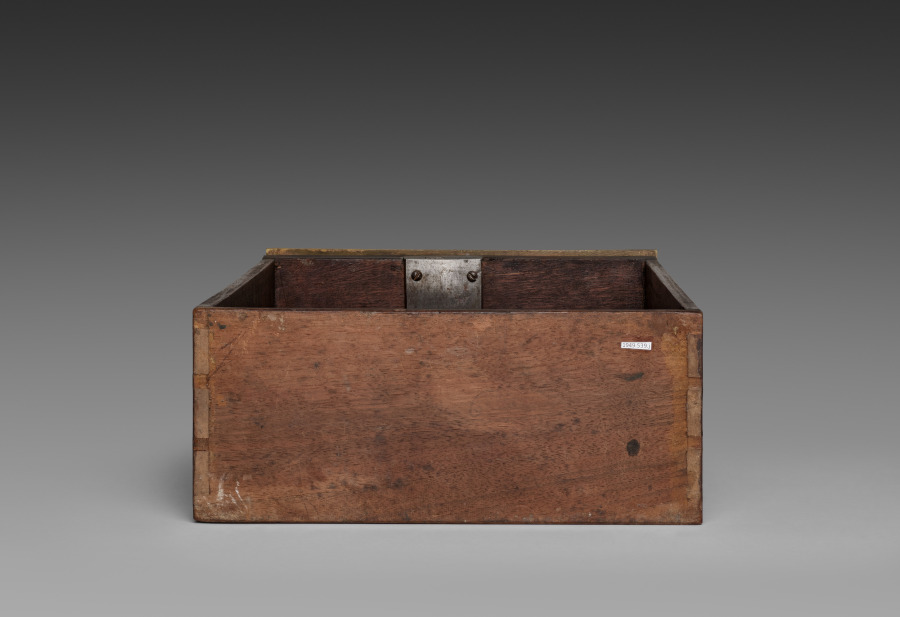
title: Side Drawer for Cabinet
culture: France, late 17th Century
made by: André-Charles Boulle (French, 1642–1732)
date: c. 1690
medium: ebony, marquetry in metal and tortoise shell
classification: Furniture and woodwork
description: Appointed cabinetmaker to King Louis XIV in 1672, André-Charles Boulle became a master of furniture making in France during the late 1600s until his death in 1732. Known primarily for his use of marquetry, in which metal patterns are inlaid into tortoiseshell then applied within the veneered surface of the furniture, Boulle established a level of quality and craftsmanship few others could achieve. As a result, his work found favor at the royal court and among other aristocrats and diplomats eager to impress the king. The inclusion of a medallion depicting Louis XIV within the bronze decoration of this chest would have identified the owner with the royal court. Often exhibiting stout architectural proportions with elegant groups of inlaid motifs such as the parrot on the central panel of this chest, Boulle’s designs are an example of the intellectual fashion for contrasting ideas, materials, and motifs.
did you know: Originally designed to sit atop an elaborate tall stand, this chest was likely altered in the late 1700s to reduce its scale and height.